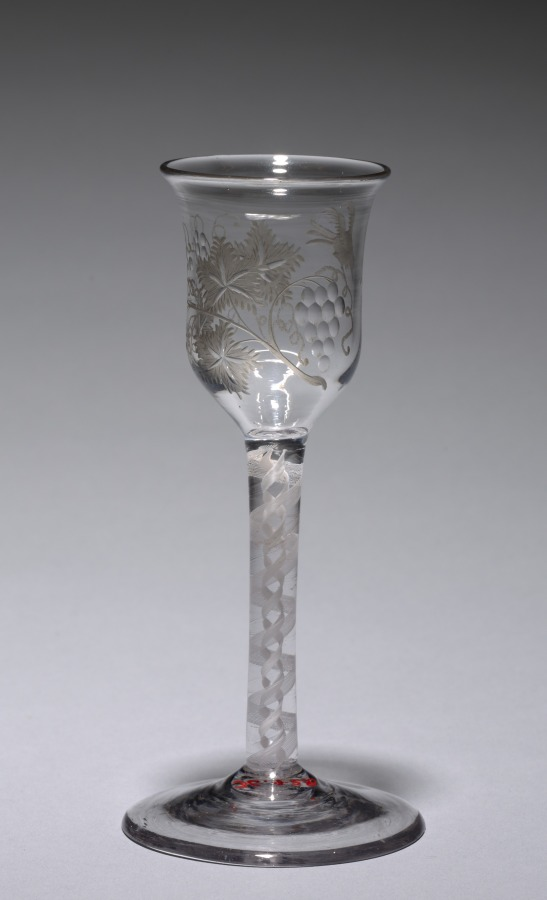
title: Wine Glass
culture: England, 18th century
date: 1750–1799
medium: glass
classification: Glass